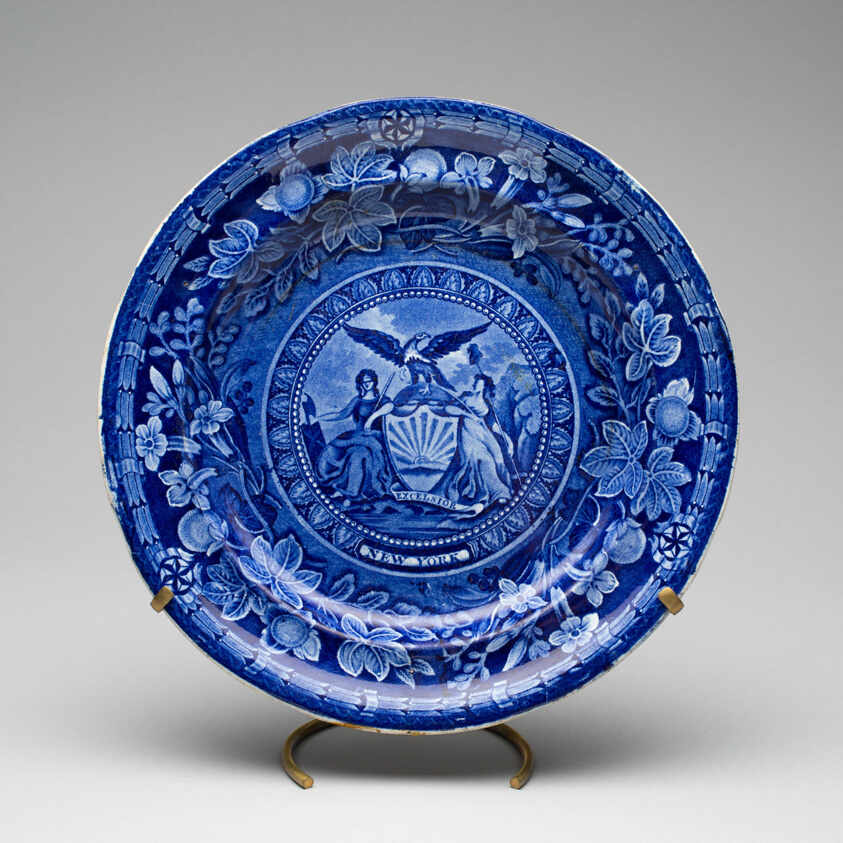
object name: Decorative Arts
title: Plate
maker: English for the American market; Staffordshire, England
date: c. 1829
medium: Earthenware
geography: Staffordshire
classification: plate (general, dish); earthenware; dish (vessel); american decorative arts; ceramics; decorative arts